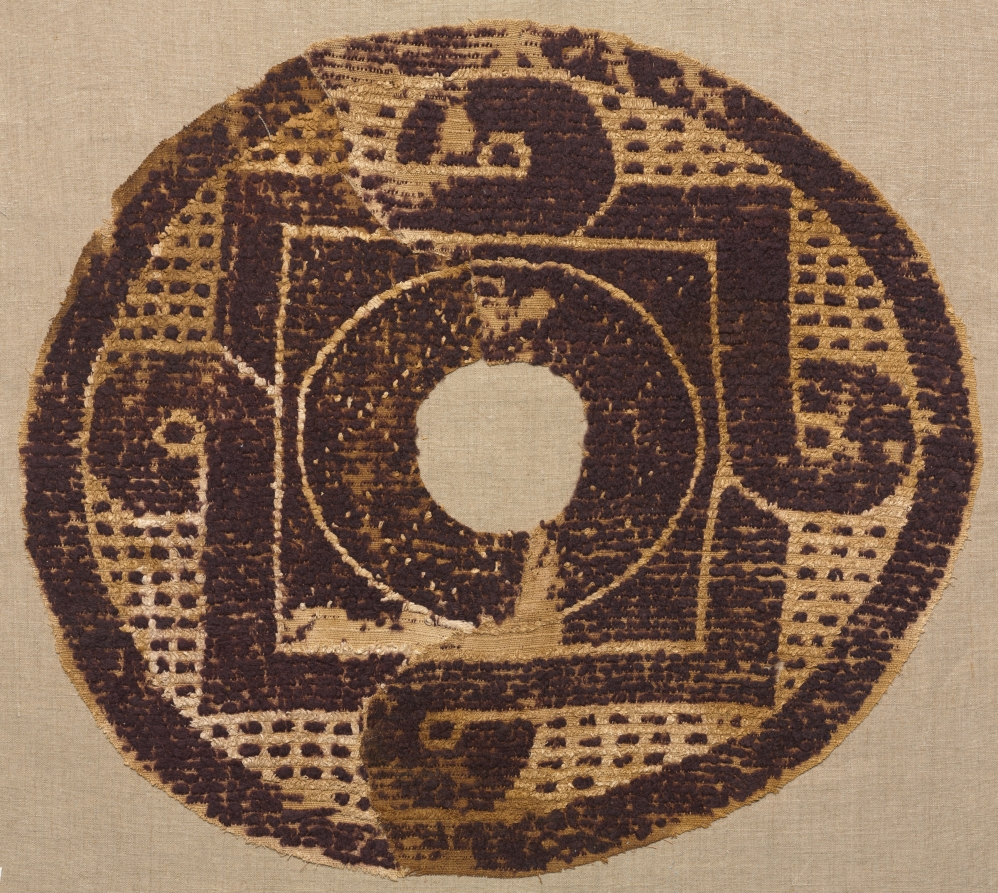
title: Roundel from a Blanket or Cover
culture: Egypt, Byzantine period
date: 300s–400s CE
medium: tapestry weave with supplementary weft wrapping; undyed linen and dyed wool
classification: Textile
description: Since pharaohs ruled ancient Egypt, linen cloth was woven with woolen loops for increased warmth and used as blankets and covers. Monochrome or single-color decoration as seen here dates this piece to the AD 300s. Polychrome or multicolor designs came later. Formed with deep purple wool and natural linen, the design consists of an outer circle with a knotted square inside.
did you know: The center element has been lost.